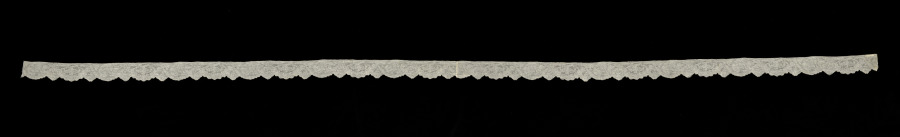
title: Lace Edging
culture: France, Valenciennes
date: 1750–99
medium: Linen: bobbin lace (Valenciennes)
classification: Lace